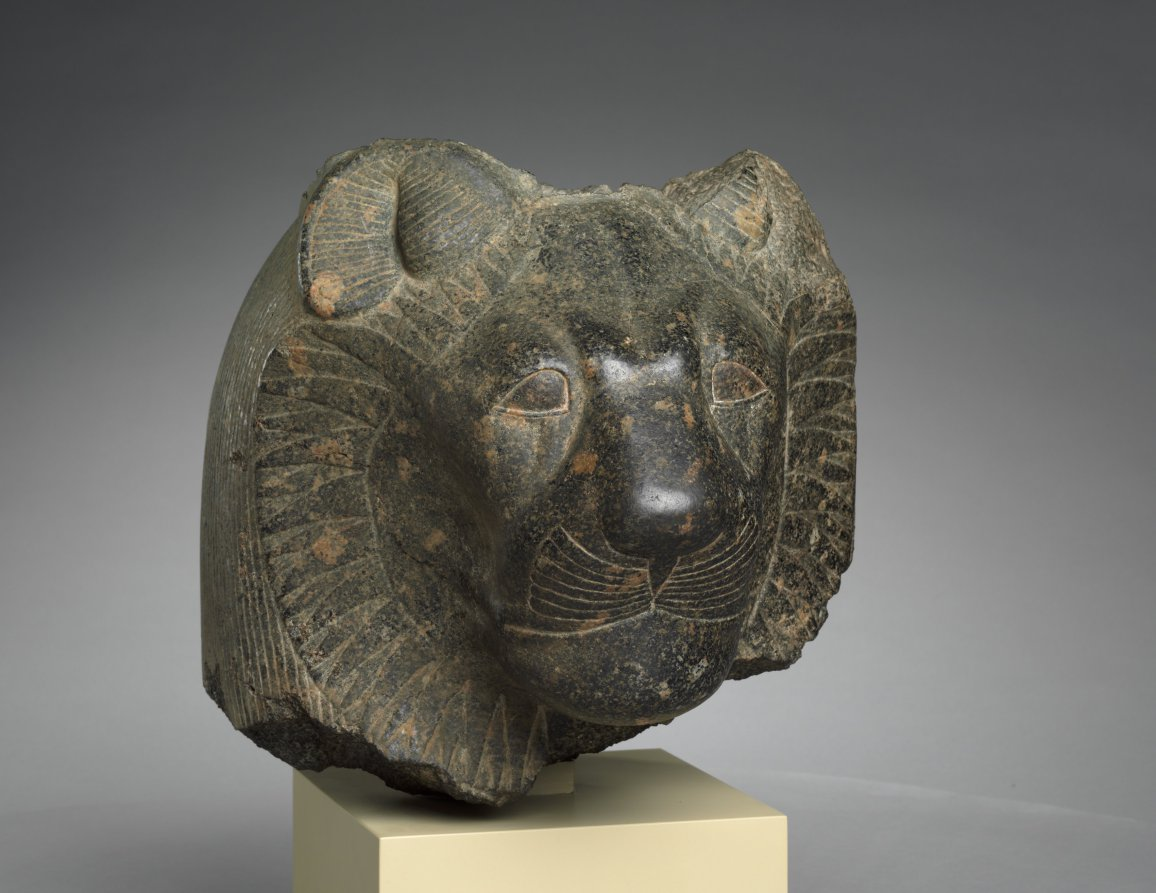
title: Head of Sekhmet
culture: Egypt, Thebes(?), New Kingdom (1540–1069 BCE), Dynasty 18, reign of Amenhotep III (1390–1352 BCE)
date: c. 1391–1353 BCE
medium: granodiorite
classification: Sculpture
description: This lioness head once belonged to a grand statue of the goddess Sekhmet, "the powerful one," probably seated and wearing a tight dress. Possibly appealing to her healing aspect, Pharaoh Amenhotep III, often described as “beloved of Sekhmet,” commissioned and dedicated hundreds of large granodiorite Sekhmet sculptures in his Theban mortuary temple. Thus, this head likely comes from Thebes, perhaps later moved across the Nile—like many such sculptures—to the temple of Mut, a related deity, at Karnak. Behind her stylized ruff, Sekhmet wears a wig, once crowned with a sun disk and uraeus, the stylized cobra symbolizing royal or divine power.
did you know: Amenhotep III may have dedicated 730 statues of Sekhmet, two for each day of the year.